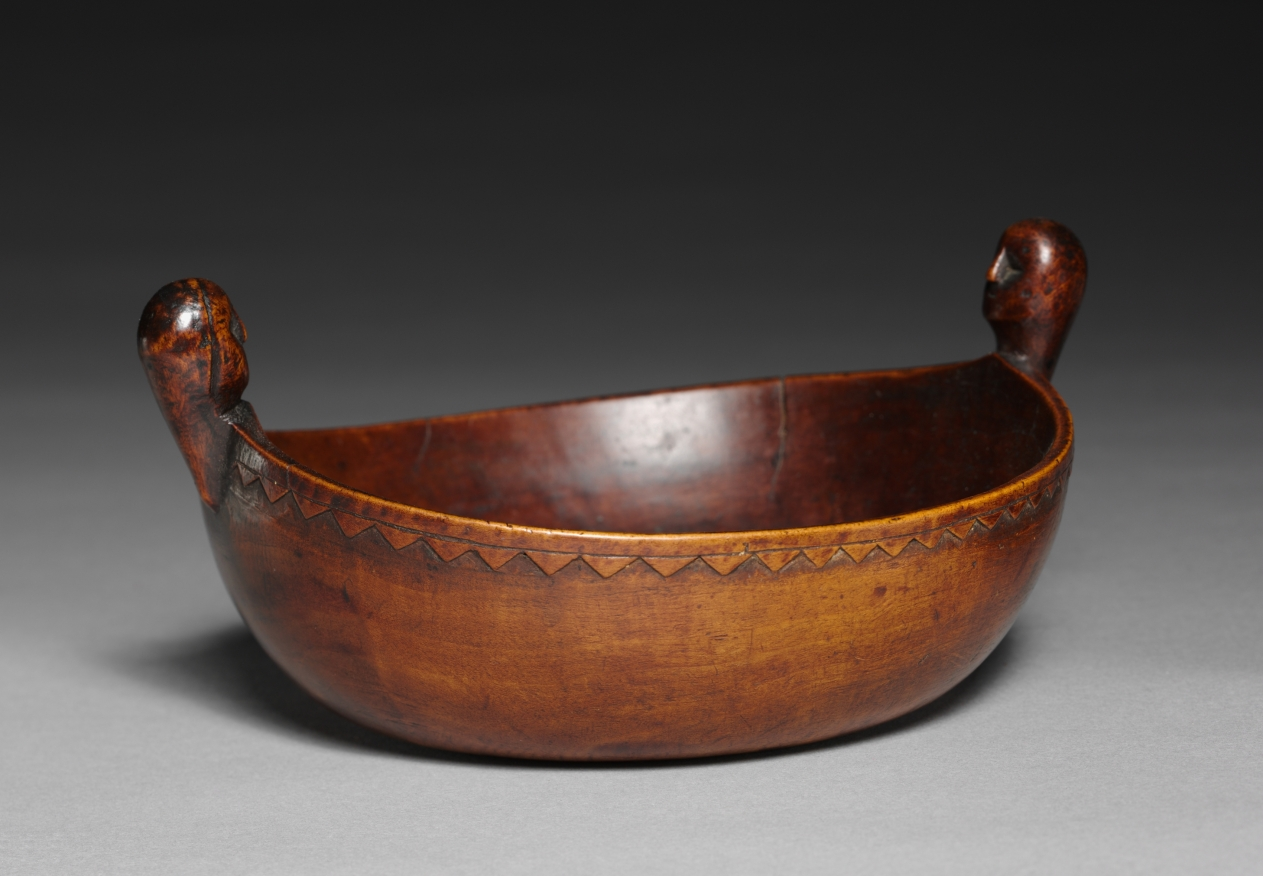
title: Bowl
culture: Native North America, Northeastern Woodlands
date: early 1800s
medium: wood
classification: Wood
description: Fine wooden bowls were often used during feasts in the Northeastern Woodlands. The heads on the rims may represent spirit beings, perhaps the owner’s guardian spirits, acquired through dreams or visions—thought to be the ultimate sources of truth. The medium may also be profoundly meaningful. A Great Lakes (Meskwaki) Native said in 1911, “The murmur of the trees when the wind passes through is but the voices of our grandparents. Often a whole forest hums with talk . . . we often hear the sound of their laughter and the sound of their lamentations.”